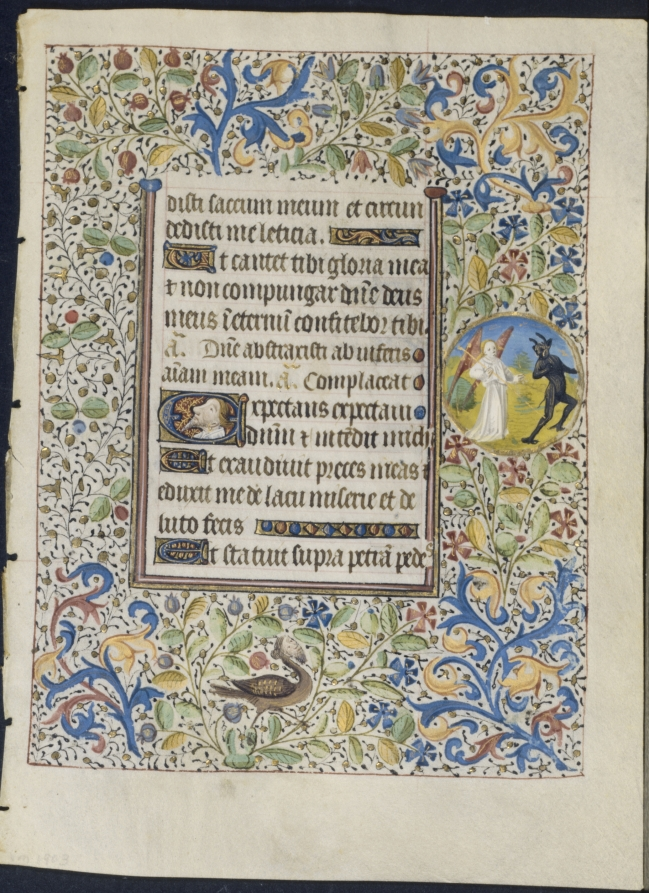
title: Leaf from a Book of Hours: Office of the Dead: Angel Chasing a Devil (recto)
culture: France, Paris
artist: circle of Coëtivy Master (French)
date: c. 1460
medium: ink, tempera and gold on vellum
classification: Manuscript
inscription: [consci]disti saccum meum et circum- dedisti me Laetitia. Ut cantet tibi gloria mea Et non conpungar Domine deus Meus in aeternum confitebor tibi. Ant. Domine abstraxisti ab inferis Animam meam. Ant: Complaceat. Et exaudivit preces meas: et eduxit me de lacumiseriar, et de luto faecis. Et Statuit supra petram Pedes…[Continues onto Verso]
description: The elaborate floral and foliated borders of this leaf, decorating the top, bottom, and sides of both recto and verso, contain four separate elements: blue and gold acanthus leaves, gold-leaf ivy vines, sprays of flowers or fruit, and a grotesque. Here the margin prominently includes an illuminated roundel with an angel chasing a devil with a lance. As a time-saving device, illuminators in the 1450s and later would often paint identical borders on both sides of a leaf. The motifs would be drawn on one side and then traced on the other by holding the leaf against a window. The manuscript from which this leaf came is no longer intact. It included numerous painted roundels relating to the lives of Saint Catherine of Alexandria and the more obscure Saint Alexis. It is possible that the manuscript originally belonged to a married couple for whom these saints served as patrons.